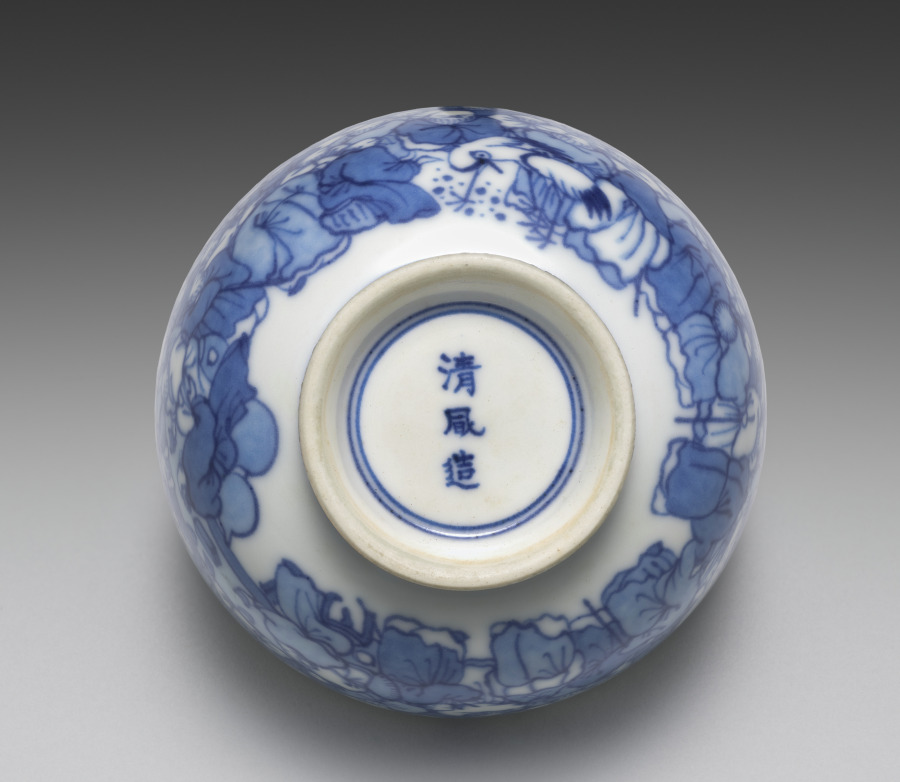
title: Teacup from Teacups with a Hundred Sages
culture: Japan, Meiji period (1868–1912)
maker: Seifū Yohei III (Japanese, 1851–1914)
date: 1893–1914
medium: One from a set of five teacups; porcelain with underglaze blue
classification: Ceramic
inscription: 清風造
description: Each of these five teacups has a painting of identical design in underglaze blue, but as the tiny figures are drawn entirely by hand, each cup has its own personality. The theme of the sencha cups is an assembly of sages or immortals, literally “a hundred venerable [people]” (hyakurō). The myriad figures crowd the scene in groups. The god of longevity, with his tall forehead, sits with his cranes, having flown in from Mt. Penglai on the Isle of the Immortals. Seven long-bearded sages sit around a stone table, chatting and drinking; one is seated on an enormous gourd. Of course, there is a stack of books on the table, and elsewhere, scrolls are being written upon or read—in one case held very close by a sage who is wearing glasses. The design was enormously popular in ceramics made for those engaged in literati culture.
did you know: Seifū Yohei III (1851–1914) produced many works for tea gatherings where people drank Chinese-style leaf-tea (sencha).